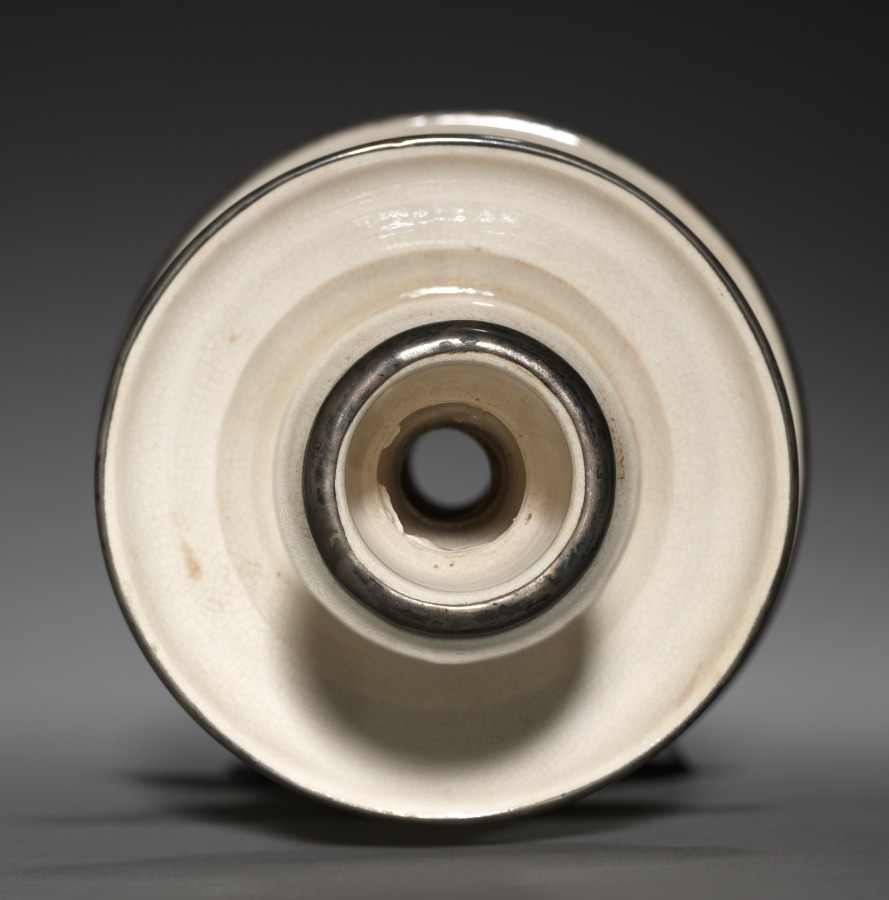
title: Candlestick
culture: China, Ming dynasty (1368–1644)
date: 1600s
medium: glazed porcelain with metal rims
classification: Ceramic